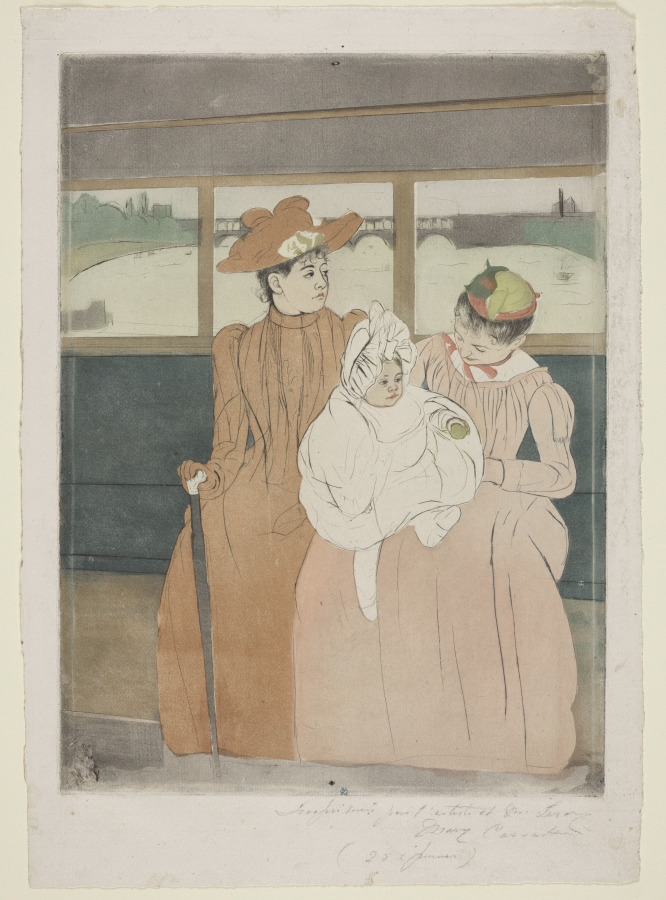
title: In the Omnibus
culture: France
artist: Mary Cassatt (American, 1844–1926)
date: 1890–91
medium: color drypoint and aquatint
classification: Print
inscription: inscribed, in pencil, at lower right below platemark: Imprimé par l'artiste et M. Leroy / Mary Cassatt / (25 épreuves); stamped at bottom center, in blue ink, on platemark: MC [Lugt 604]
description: This print belongs to a series of color etchings created by Mary Cassatt between 1890 and 1891. Each was influenced by the artist's study of Japanese woodblock prints, especially in their use of flat planes of color and domestic subject matter. In the scene depicted here, a middle-class woman accompanies her nursemaid and child on errands throughout Paris. The group rides in an omnibus, a form of public transportation where different genders and classes could intermingle. While the nanny's attention stays focused on her young charge, the female subject appears distracted, gazing toward the world beyond.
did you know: The artist Camille Pissarro described the series of prints to which this work belongs as "admirable, as beautiful as Japanese work," praising Cassatt's translation of Ukiyo-e woodblocks.